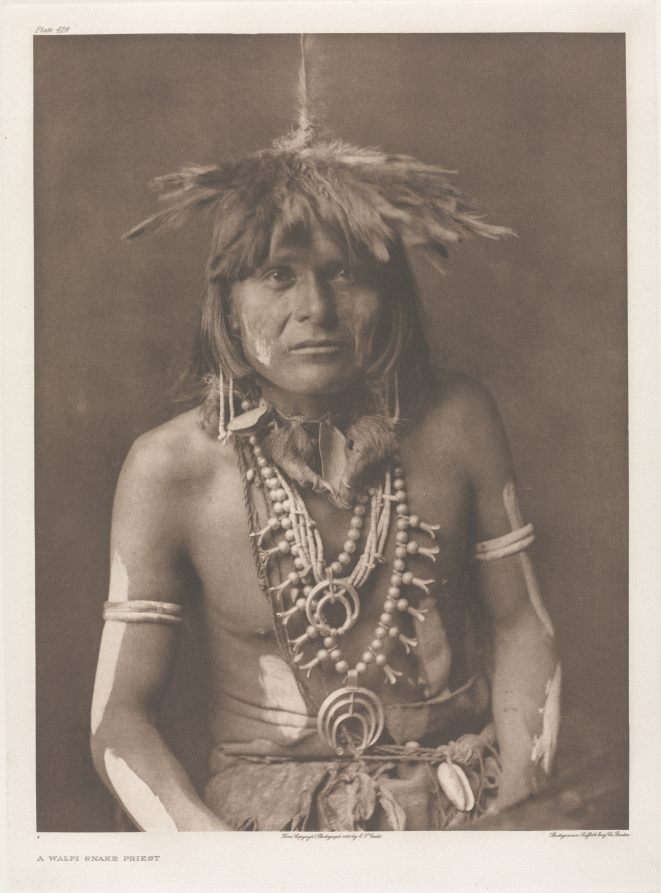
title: Portfolio XII, Plate 429: A Walpi Snake Priest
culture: America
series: The North American Indian: being a series of Portfolios picturing and describing the Indians of the United States, the Dominion of Canada, and Alaska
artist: Edward S. Curtis (American, 1868–1952)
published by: The University Press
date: 1900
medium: photogravure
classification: Portfolio